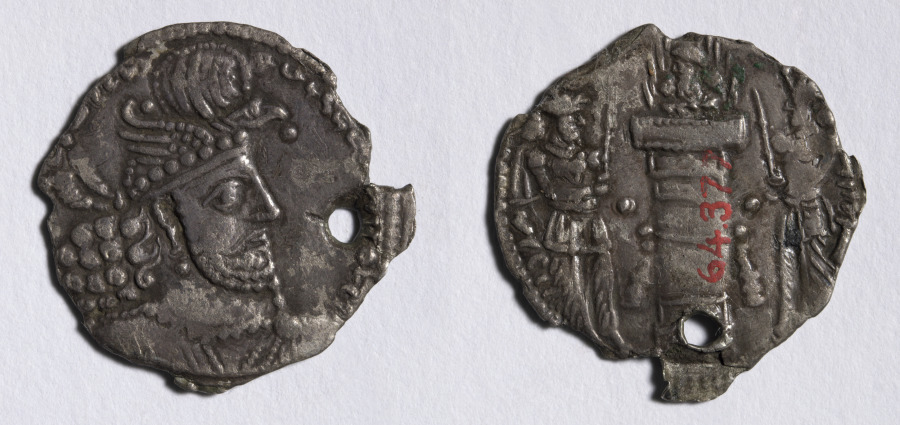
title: Drachm: Bust of Hormizd II (obverse); Fire Altar with Bust (reverse)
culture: Iran, (minted), Sasanian Empire (224–651 CE), reign of Hormizd II (303–309)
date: 302–9 CE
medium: silver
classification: Coins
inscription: 𐭬𐭦𐭪𐭠𐭠𐭭𐭬𐭫𐭪𐭠𐭠𐭩𐭫𐭠𐭭𐭬𐭭𐭪𐭲𐭥𐭬𐭭𐭩𐭦𐭣𐭠𐭭 𐭬𐭦𐭣𐭩𐭮𐭭𐭡𐭢𐭡𐭥𐭧𐭬𐭦𐭣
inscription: 𐭠𐭲𐭥𐭫𐭦𐭩𐭠𐭥𐭧𐭬𐭦𐭣